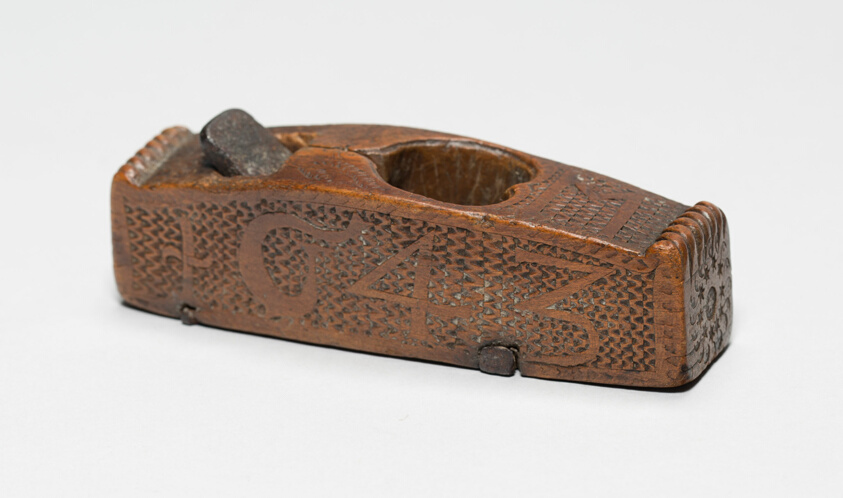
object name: Metalwork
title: Shaping Plane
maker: Possibly Germany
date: 1643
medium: Iron and wood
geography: Germany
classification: tool; european decorative arts; metalwork